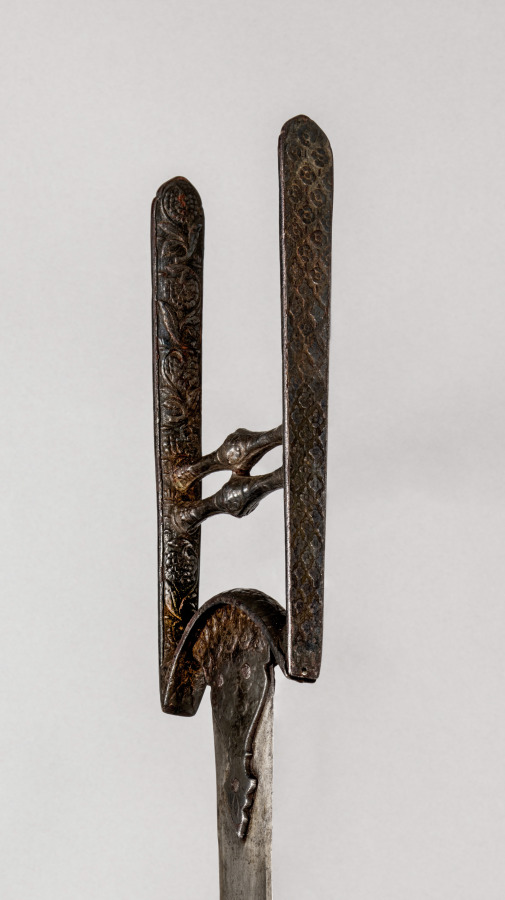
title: Khatar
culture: Northwestern India, Rajasthan, Jaipur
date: 1600s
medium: iron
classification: Arms and Armor